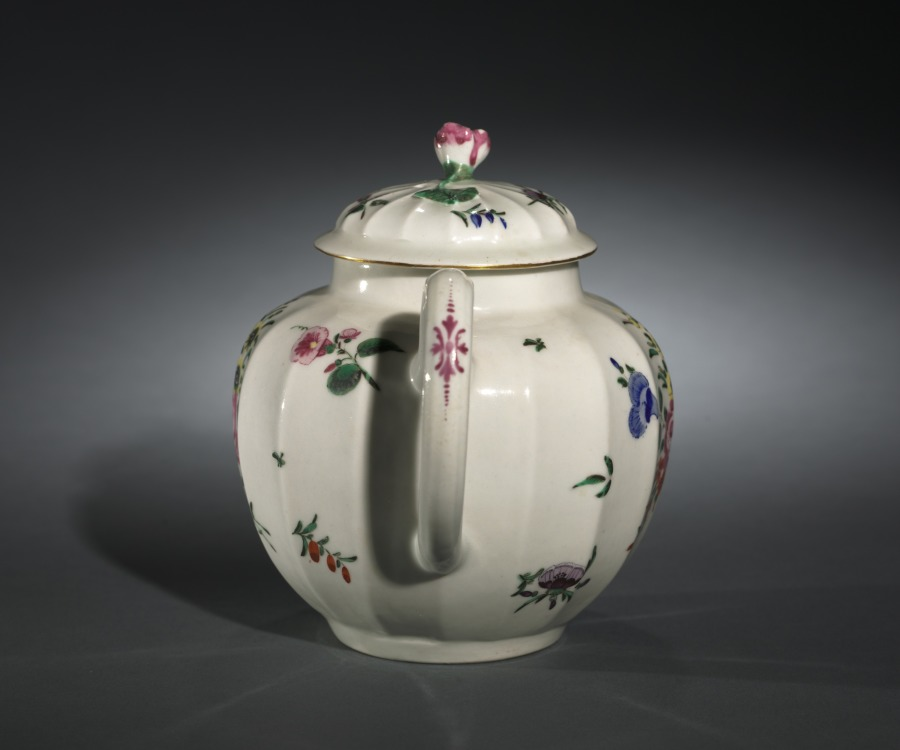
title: Teapot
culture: England, Worcester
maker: Worcester Porcelain Factory (British, established 1751)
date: c. 1755–75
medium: porcelain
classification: Ceramic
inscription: Mark on the bottom - An X with radiating lines inside a box.